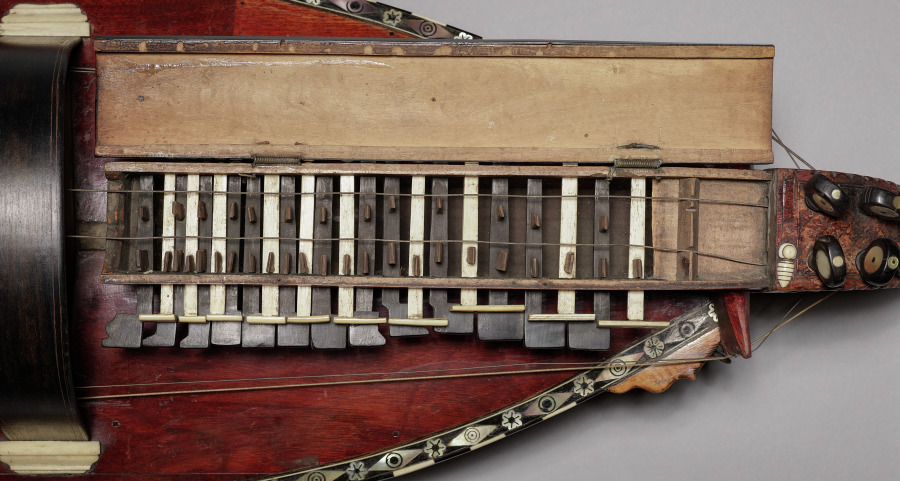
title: Vielle à roue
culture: France, 18th century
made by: Pajot of Jánzat (French)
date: 1700s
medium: wood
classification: Musical Instrument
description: The instrumentalist could play melodies on the keyboard that presses tangents against one or more strings. Often there are also multiple drone strings, which give a constant pitch accompaniment to the melody, resulting in a sound similar to that of bagpipes. This type of instrument is depicted in several artworks in the CMA collection: 1924.656, 2008.34.2, 1960.20. The vielle à roue is also related to the Swedish nyckelharpa, which was featured on the CMA performing arts series in 2017 played by Emilia Amper.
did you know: Also known as a “hurdy-gurdy” or “wheel fiddle,” this instrument produces sound by a hand crank-turned rosined wheel rubbing against the strings.